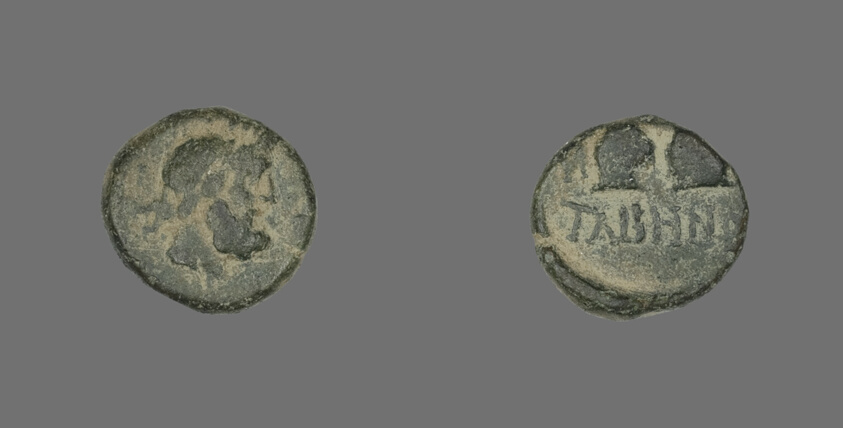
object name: Coin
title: Coin Depicting the God Zeus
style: greek, ancient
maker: Greek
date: about 1st century BCE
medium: Bronze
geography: Ancient Greece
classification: coin; ancient art